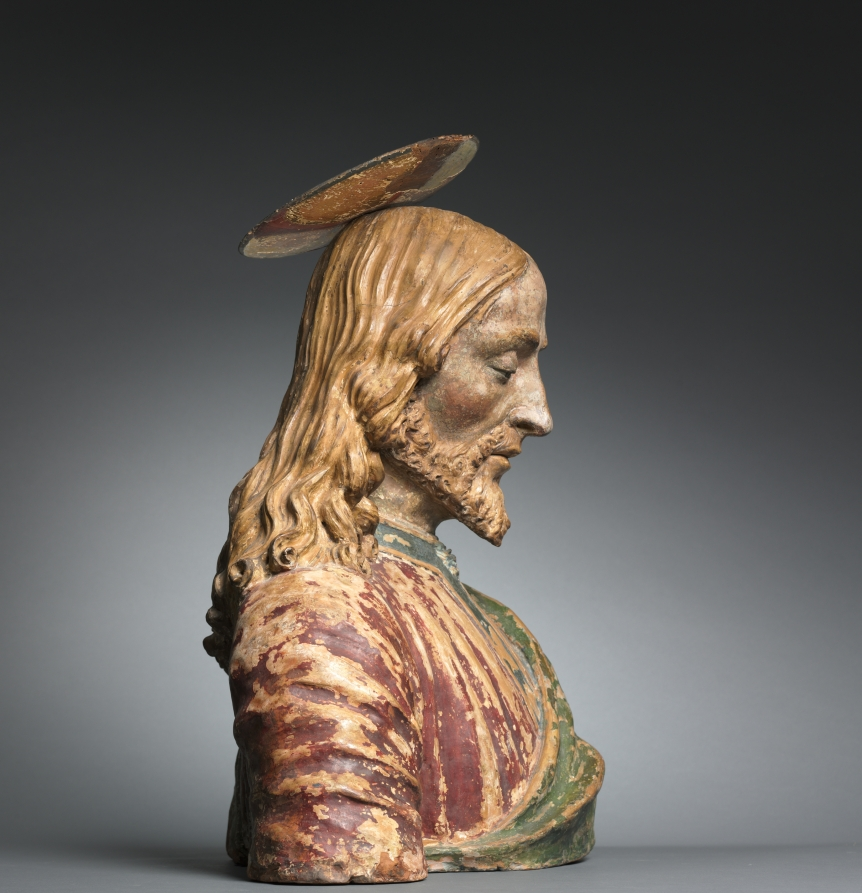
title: Bust of Christ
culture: Italy, Florence, 15th century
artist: workshop of Andrea del Verrocchio (Italian, 1435–1488)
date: c. 1470–1500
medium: painted terracotta and wood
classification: Sculpture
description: In the late 1400s Andrea del Verrochio set up a large workshop where he and his assistants reproduced copies of his sculpture and other works for a middle-class market. Originality was not the objective; in fact, most people were only interested in purchasing replicas of well-known works. This sculpture was modeled after Verrocchio's Christ figure in the bronze sculpture group Christ and St. Thomas at Orsanmichele in Florence, Italy. The medium of terracotta, which was cheaper than bronze or marble, made it possible to offer copies at a reasonable price. Additionally, workshop practices reduced the cost of the work by reducing labor time. Assistants were usually responsible for the shaping of the torso and garments, while Verrocchio was often in charge of executing the facial features and hair. In this sculpture the torso is out of proportion, and the general discrepancy in quality between the parts of the sculpture is due to the fact that it is a workshop production. Given that the facial features are so well executed and the statue retains a stirring motional quality, a trademark of Verrocchio's style which artists found hard to duplicate, it is probable that this sculpture was made in Verrocchio's studio, possibly even with active involvement by the artist on the head.